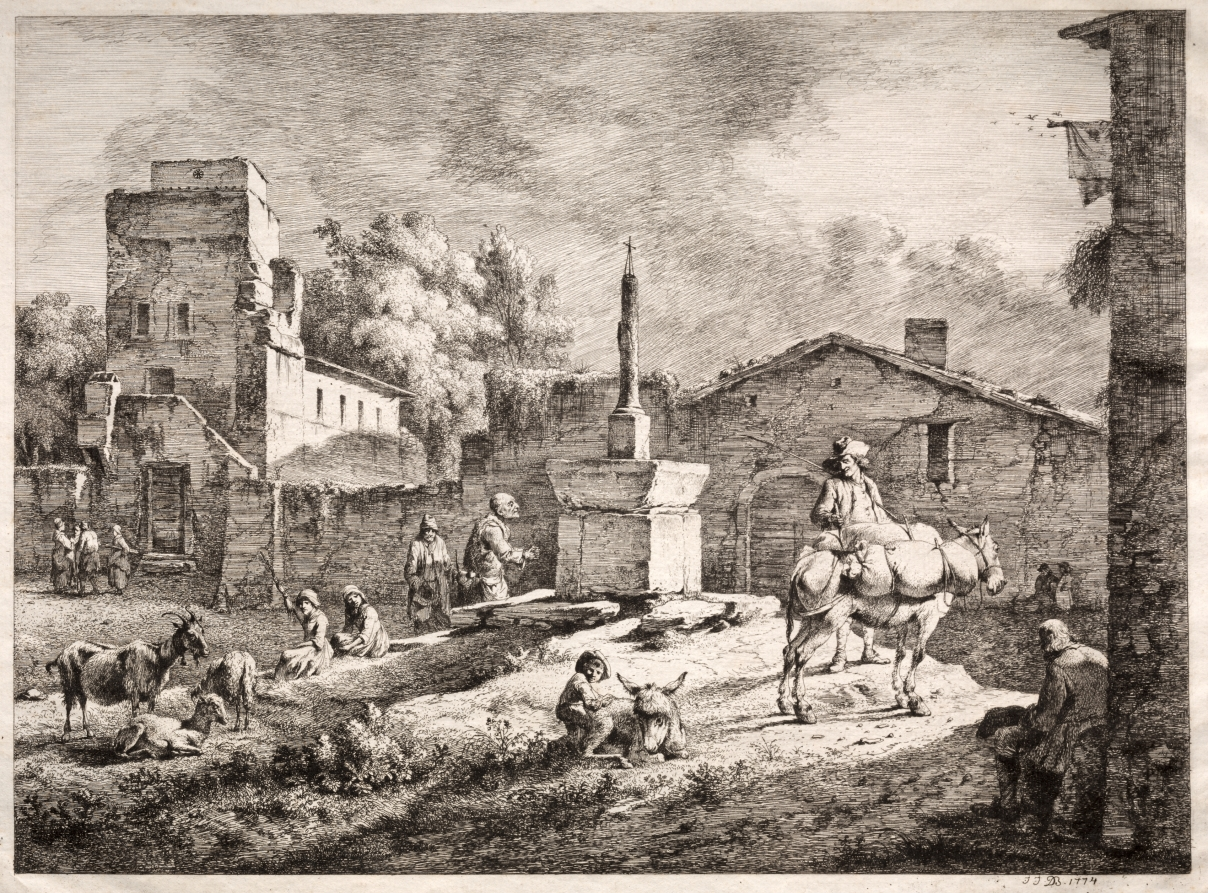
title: View of Saint-Andeol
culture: France, 18th century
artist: Jean Jacques de Boissieu (French, 1736–1810)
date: 1774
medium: etching and drypoint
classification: Print